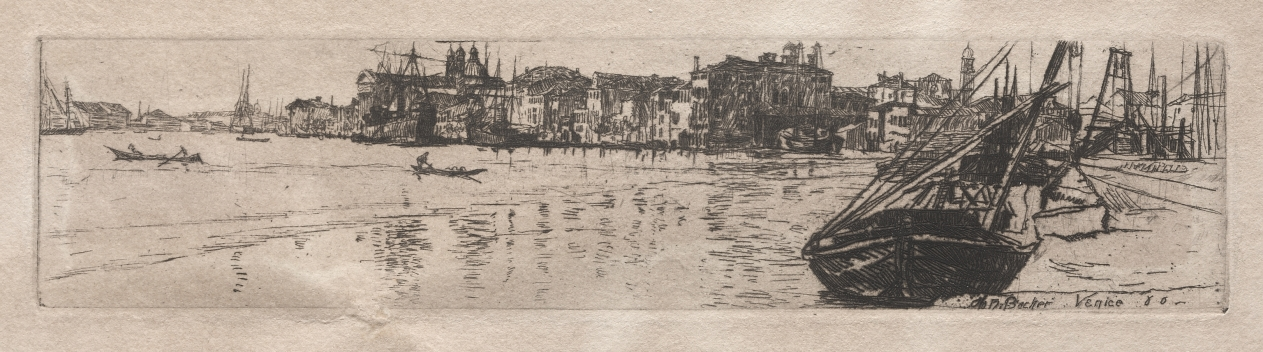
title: Zaltieri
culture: America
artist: Otto H. Bacher (American, 1856–1909)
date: 1880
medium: etching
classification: Print